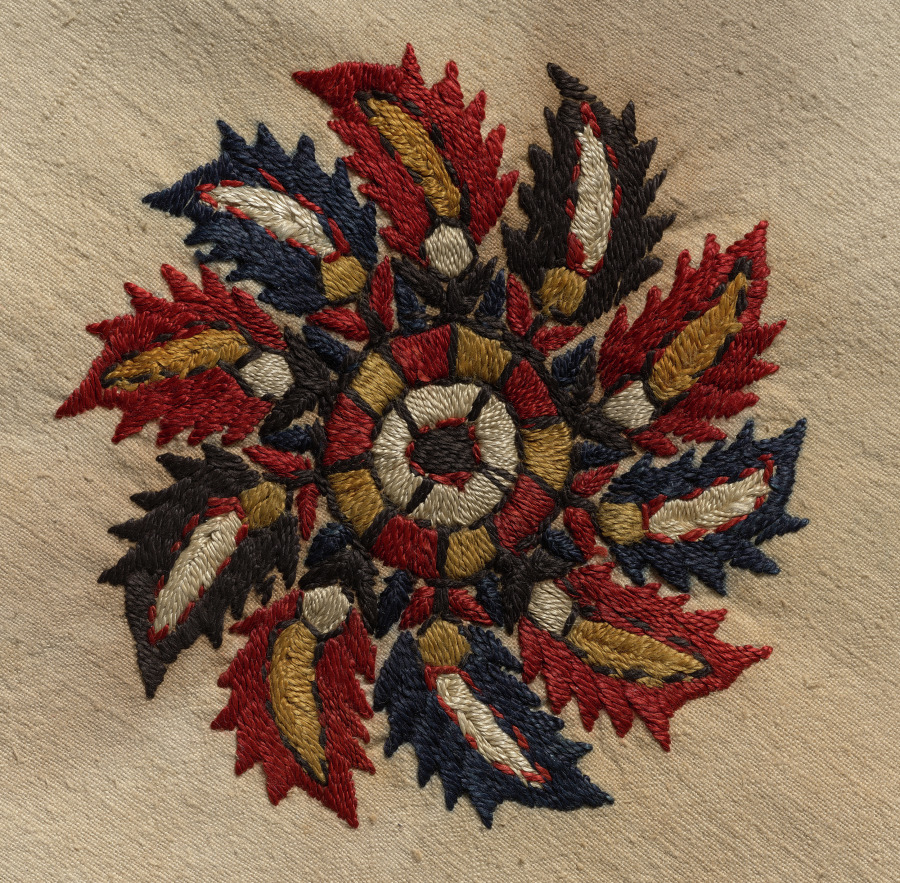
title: Furnishing textile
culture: Africa, North Africa, Algeria, Algerian embroiderer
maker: Algerian Embroiderer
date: 1800s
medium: Linen, silk, dye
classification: Embroidery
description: This textile is woven using undyed linen in a technique called a tabby weave. The artist then used red, blue, white, and ochre yellow silk threads to create embroidered floral borders and designs in each corner, topped with several birds. The style of these motifs also strongly resembles Turkish embroideries made in this period.